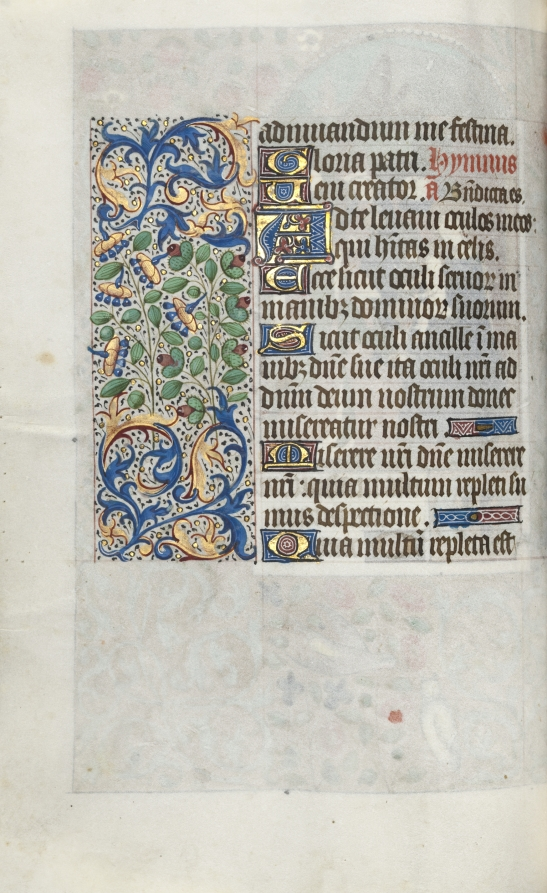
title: Book of Hours (Use of Rouen): fol. 64v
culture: France, Rouen, 15th century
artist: Master of the Geneva Latini (French, active Rouen, 1460–80)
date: c. 1470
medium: ink, tempera, and gold on vellum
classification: Bound Volume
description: In the late 1400s and early 1500s Rouen was an established and important center of book production. The city’s cathedral had a wealthy chapter that spent large sums of money to commission books and to maintain its extensive library. The stationers and booksellers would have likely been concentrated in or near the cathedral precinct. This artist, named after a manuscript now in Geneva, was Rouen’s principal illuminator during the second half of the 1400s.